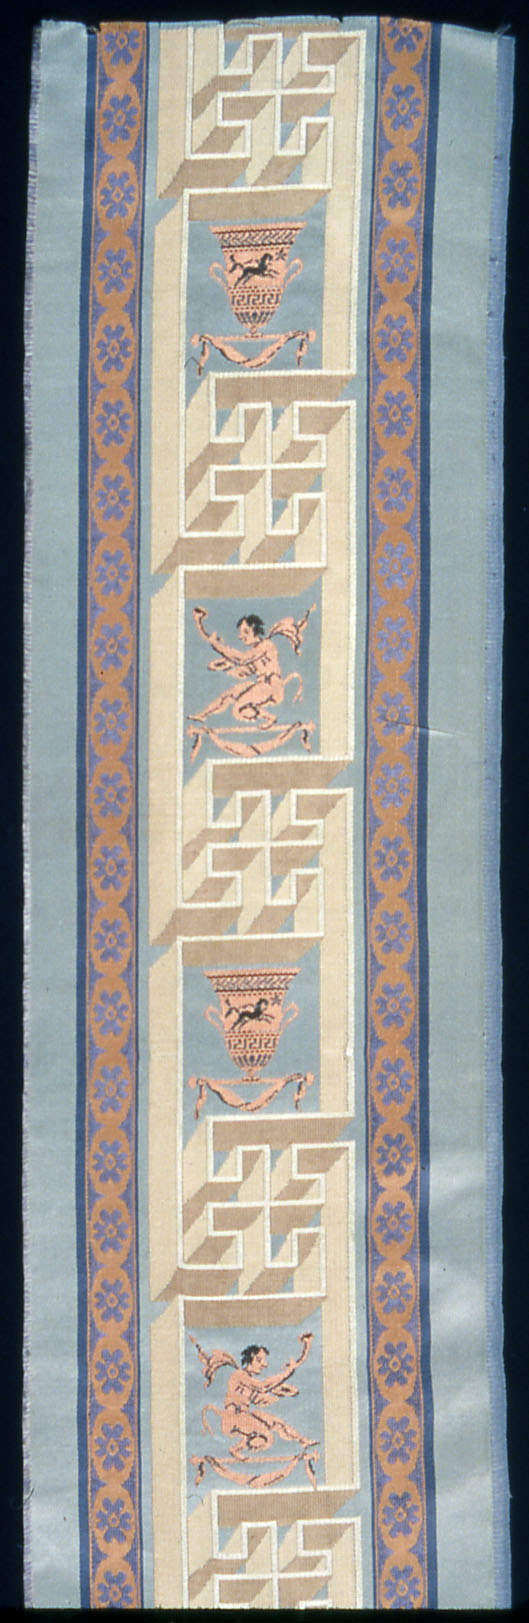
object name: Textile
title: Border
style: directoire, european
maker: France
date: Directoire period, 1790/99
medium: Silk, warp-float faced satin weave with plain interlacings of secondary binding warp, supplementary brocading wefts and self-patterning ground wefts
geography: France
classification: textile; weaving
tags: Greek, cupids